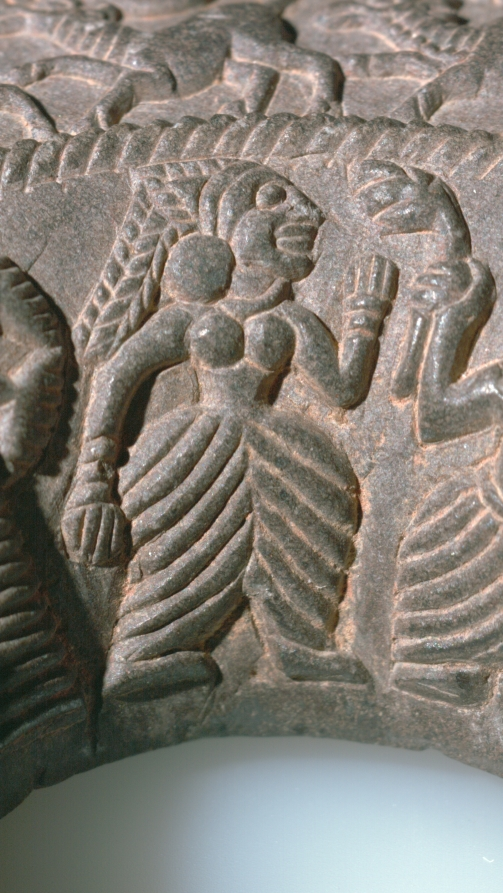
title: Ringstone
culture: India, Maurya period (322–185 BCE)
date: 200s BCE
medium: steatite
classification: Sculpture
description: Ringstones are among the earliest works of art to be created in stone during India's historical period. This example is finely carved with detailed images of affectionate couples and palm trees, running animals, and geometric motifs in concentric circles. The function of ringstones remains uncertain, since none of the surviving examples is inscribed or explained in a text.